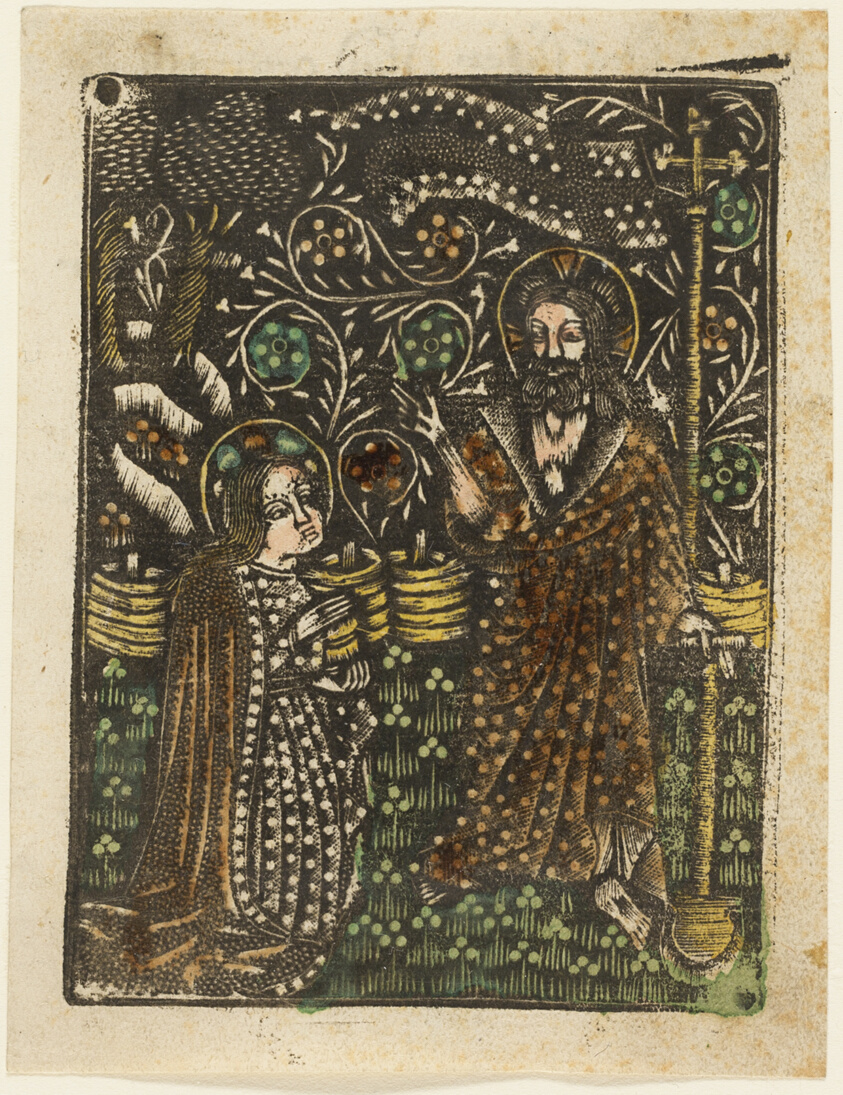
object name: Print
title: Noli me Tangere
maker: Artist unknown; Bavarian, 15th century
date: 1460–65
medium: Metalcut in black hand colored with brush and watercolor in yellow, red-brown lake, and green, on ivory laid paper, with manuscript text in pen and brown ink on verso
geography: Germany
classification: dotted/metal cut; book; prints and drawing; print